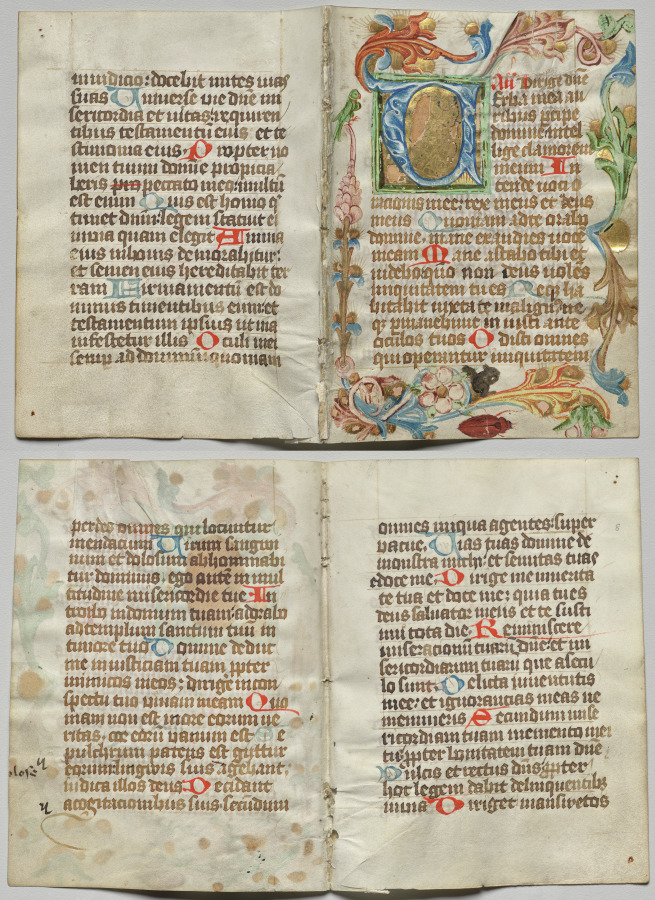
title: Bifolio from a Book of Hours: Initial V with Floral Border (recto); Text (verso)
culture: Austria (? ) or Bohemia (?), 15th century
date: c. 1460–1500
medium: ink, tempera and gold on vellum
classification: Manuscript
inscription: Dirige, D[omi]ne [Deus meus, in conspectu tuo viam meam]…Psalm 5: Verba mea auribus percipe Domine intellege clamorem meum, Intende voci orationis meae rex meus et Deus meus, Quoniam ad te orabo Domine mane exaudies vocem meam, Mane adstabo tibi et videbo quoniam non deus volens iniquitatem tu es, Neque habitabit iuxta te malignus neque permanebunt iniusti ante oculos tuos, Odisti omnes qui operantur iniquitatem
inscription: ... Decidant a cogitationibus suis, secundum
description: The word dirge, today meaning a mournful hymn for funerals, comes from the opening Latin in the Office of the Dead, seen just after the decorative letter A at upper left. During the Middle Ages, dirge became the shortened way to refer to the Office of the Dead. Although primarily recited at funerals, the office was also prayed at home as a reminder of mortality and a protection against sudden death. Surrounding the text, which contains Psalm 5, is a border decoration of acanthus leaves, believed to grow in paradise, as well as a parrot, a squirrel, a beetle, and flowers.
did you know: The Office of the Dead, usually at the end of books of hours, contains the same set of prayers the ordained used during funeral rites.